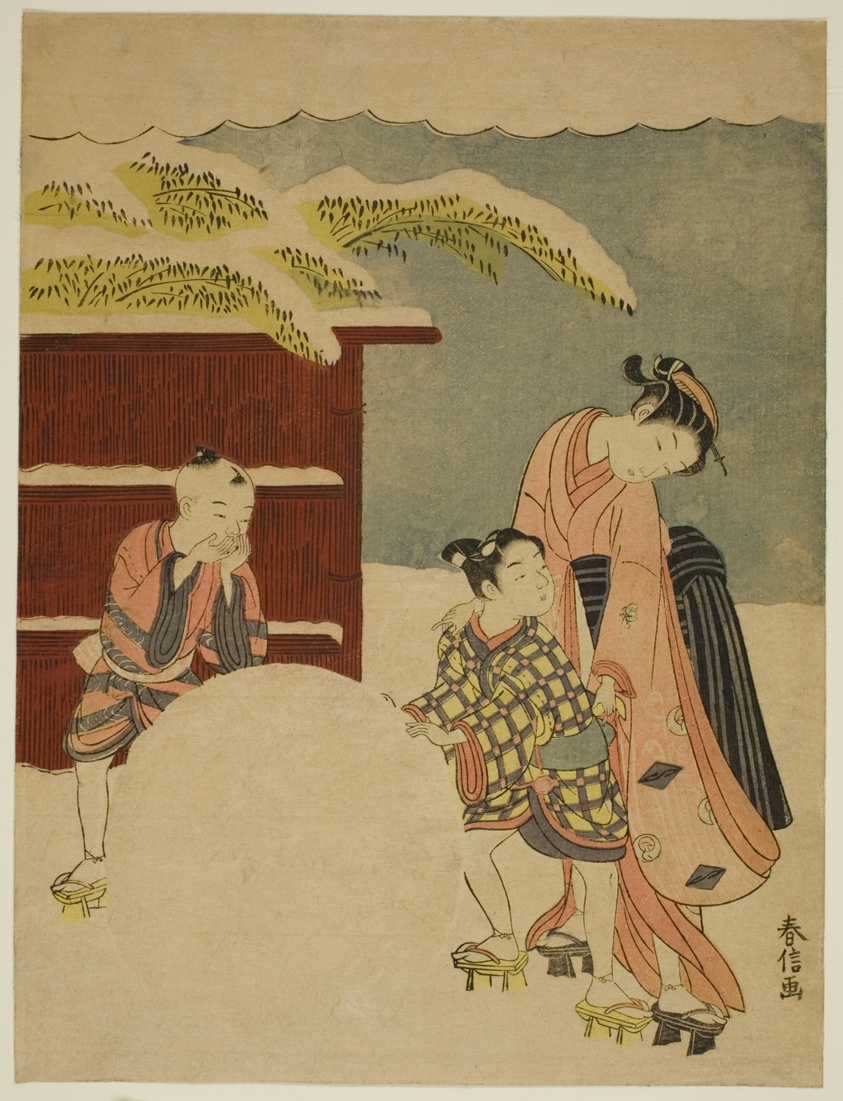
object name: Print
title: Making a Giant Snowball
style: Japanese (culture or style)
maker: Suzuki Harunobu 鈴木 春信; Japanese, 1725 (?)-1770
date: c. 1767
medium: Color woodblock print; chuban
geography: Japan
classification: woodblock print; print; asian art